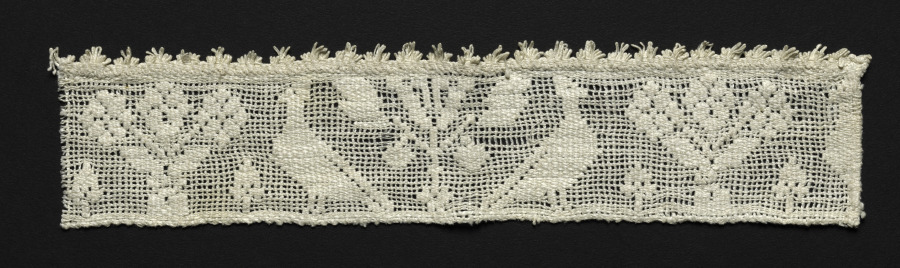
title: Fragment of a Band with Birds and Trees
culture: Italy, Sicily, 1500s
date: 1500s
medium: Bleached linen (est.): needle lace, burato (twined ground and darned in one direction)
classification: Lace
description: This lace, made in Sicily, shows a close relationship to a pattern in a model book published in Lyon, France, a commercial center of printing and luxury textile trade with strong ties to Italy. The designs were based on a grid, making it easier for the lace maker to translate the printed image into needlework.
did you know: Plant motifs, such as the blooming bushes found here, flanked by birds, were popular for their associations with well-being or blessing.